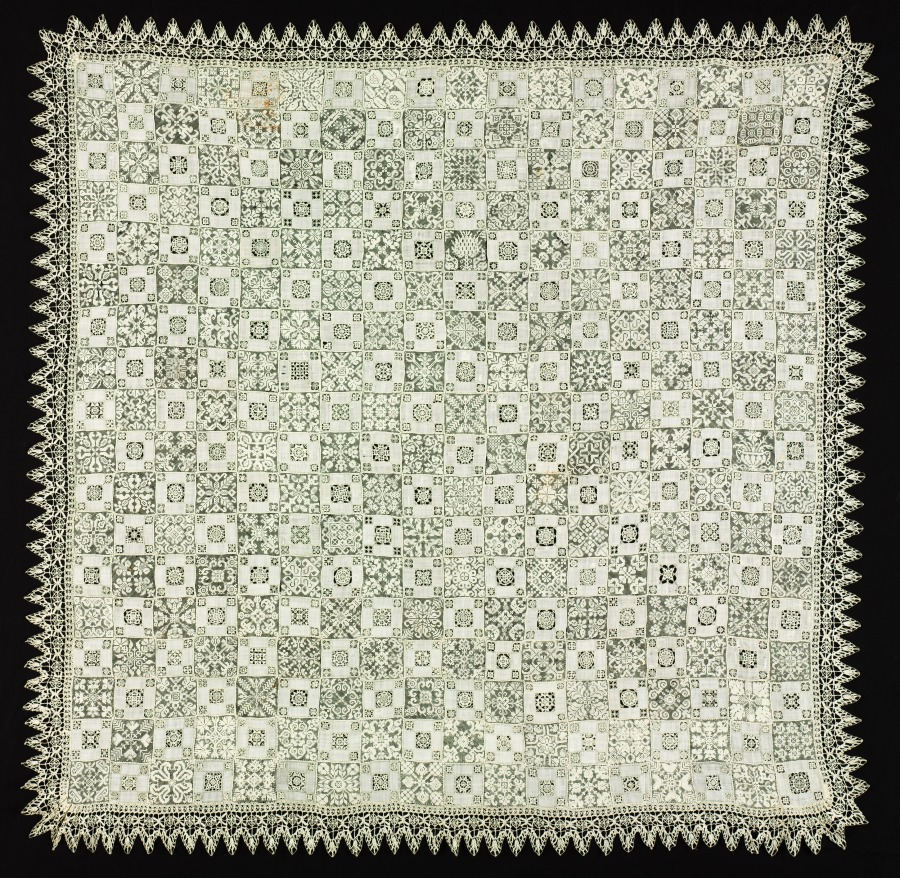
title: Cloth with Floral and Vegetal Patterns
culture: Italy, late 1500s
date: 1560–1600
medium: Bleached linen (est.): needle lace, filet/lacis (knotted ground and darned in two directions), alternating reticella squares (open cutwork), and bobbin lace edging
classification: Lace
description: Textiles often incorporate multiple needlework techniques within a single piece. One of the main techniques in this example of lace is called cutwork. In cutwork, portions of the textile ground, such as a linen or cotton cloth, are cut away and threads are removed to create holes. The edges of the hole are then reinforced with embroidery and a pattern of needle lace can be created within the perimeter. Rather than adding to the cloth to create a design, the craftsperson removes threads to fabricate a pattern.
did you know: The large size and square shape suggest that this textile would likely have been used as a table cloth.